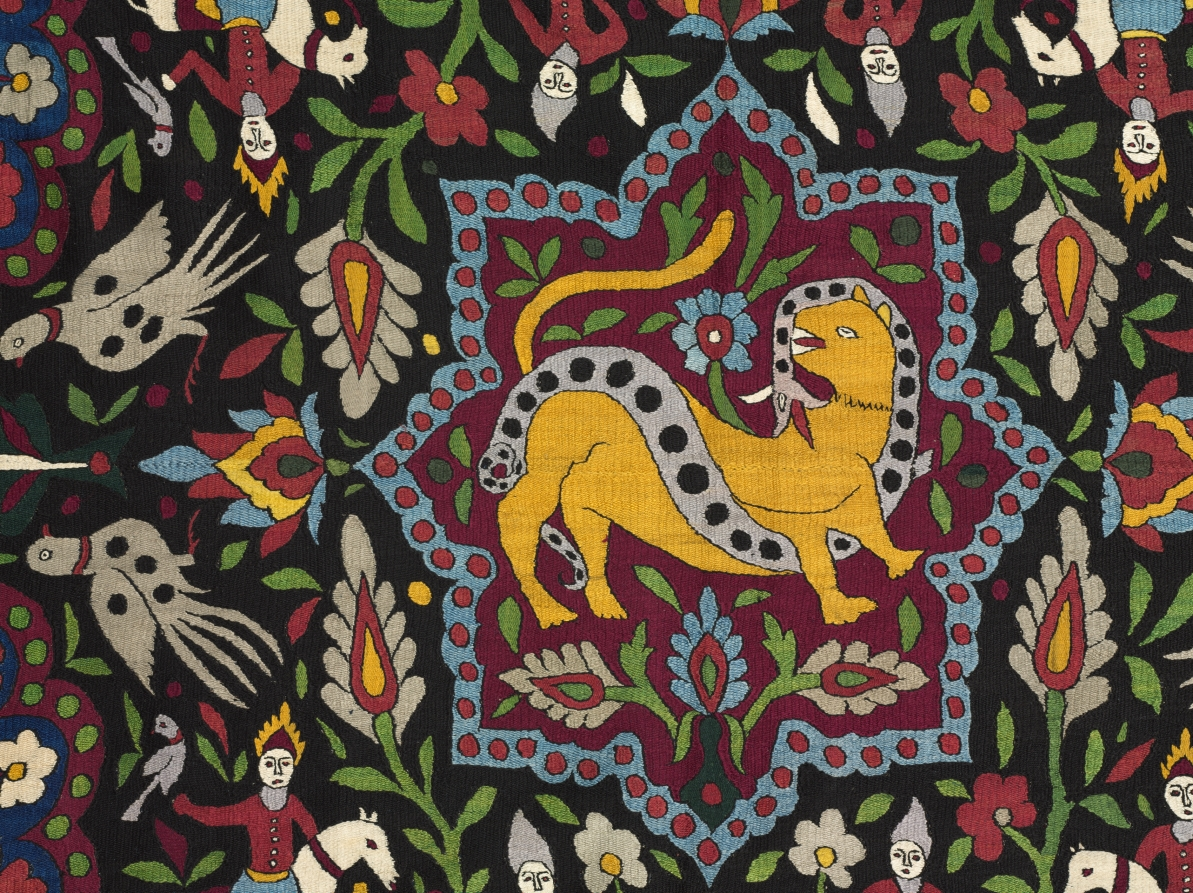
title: Ceremonial or summer floor cover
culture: Iran, Qajar period (1779-1925)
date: 1800s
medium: cotton: plain weave; silk: embroidery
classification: Embroidery